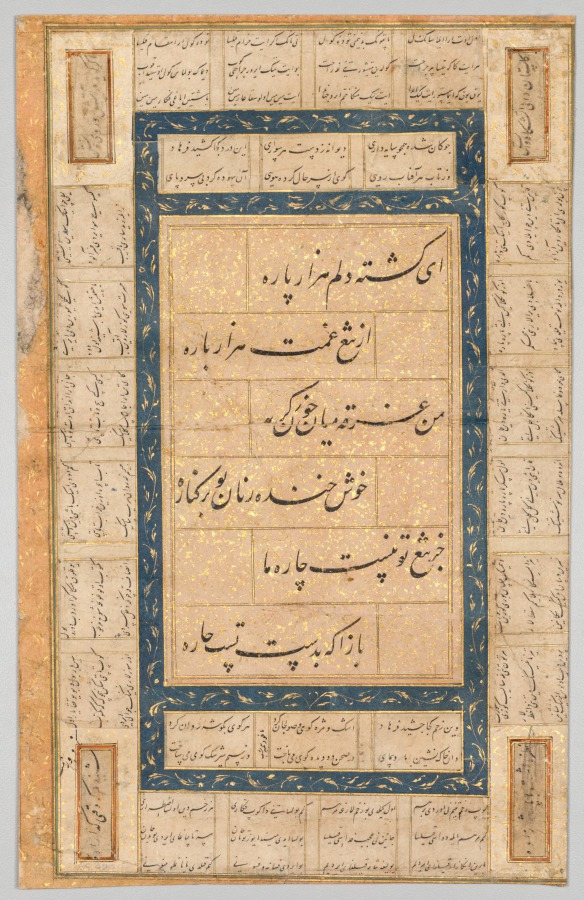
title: Calligraphy, Persian Verses (verso)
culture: Iran, Timurid period (1370-1501)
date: 1400s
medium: Opaque watercolor, ink, and gold on paper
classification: Manuscript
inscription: script: Nasta'liq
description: In Persian albums, pages of calligraphy alternated with paintings. These verses have been written in an elegant nastaliq, a cursive form of the Arabic script.